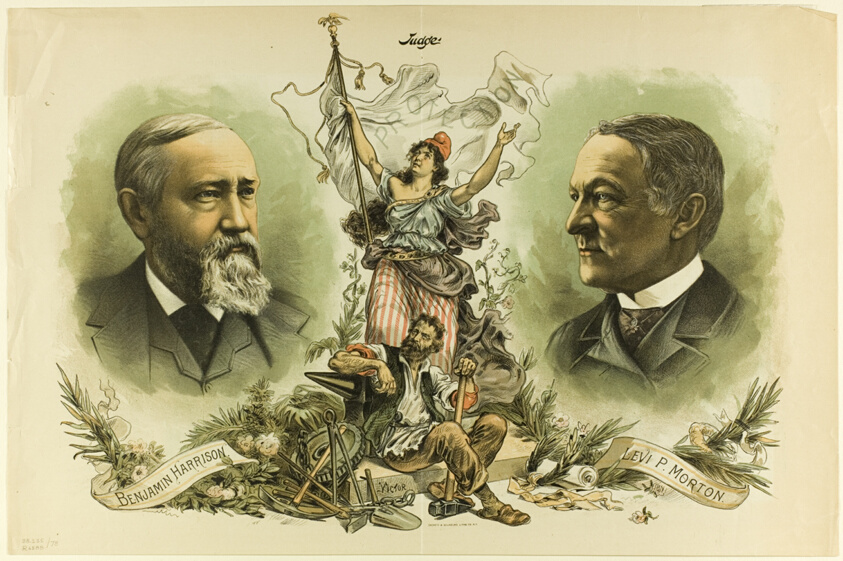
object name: Print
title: Victory Portraits of Benjamin Harrison and Levi P. Morton, from Judge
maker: Unknown Artist; American, 19th century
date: 1888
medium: Color lithograph on newsprint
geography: United States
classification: lithograph; print; prints and drawing